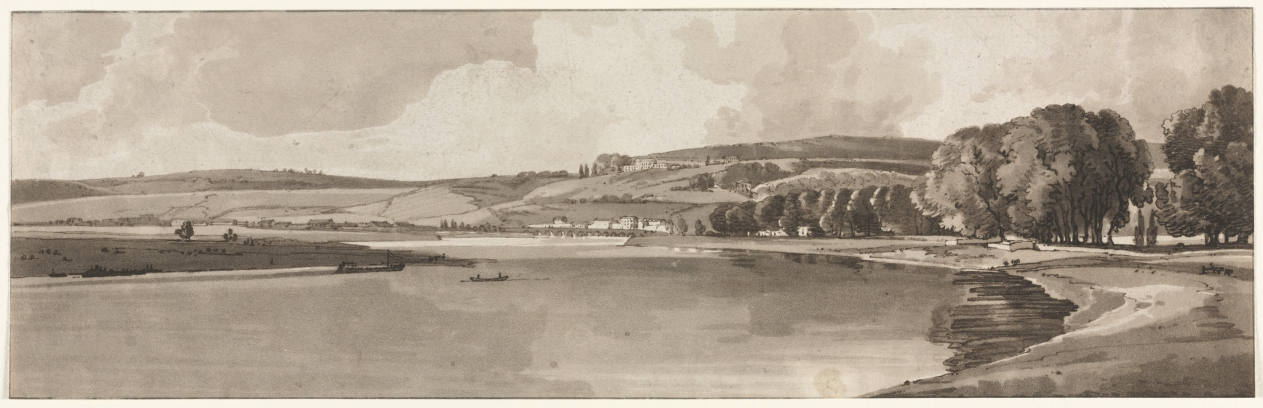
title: A Selection of Twenty of the Most Picturesque Views in Paris: View of Belle Vue & Pont de Sêve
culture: England, 19th century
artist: Thomas Girtin (British, 1775–1802)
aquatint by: Frederick Christian Lewis (British, 1779–1856)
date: 1802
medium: Softground etching and aquatint printed in brown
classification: Print